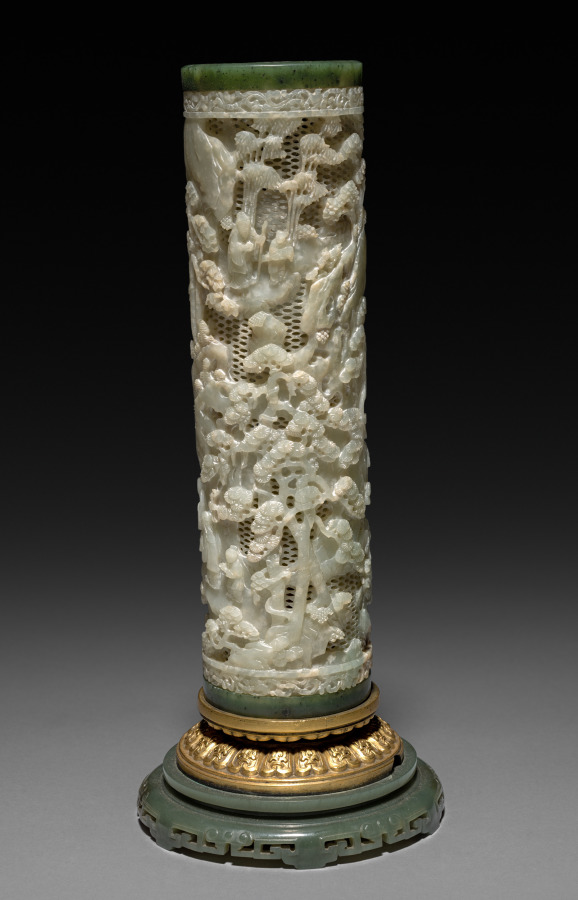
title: Cylinder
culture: China, Qing dynasty (1644-1911) or Republican period (1912-49)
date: 1800–1940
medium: jade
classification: Jade